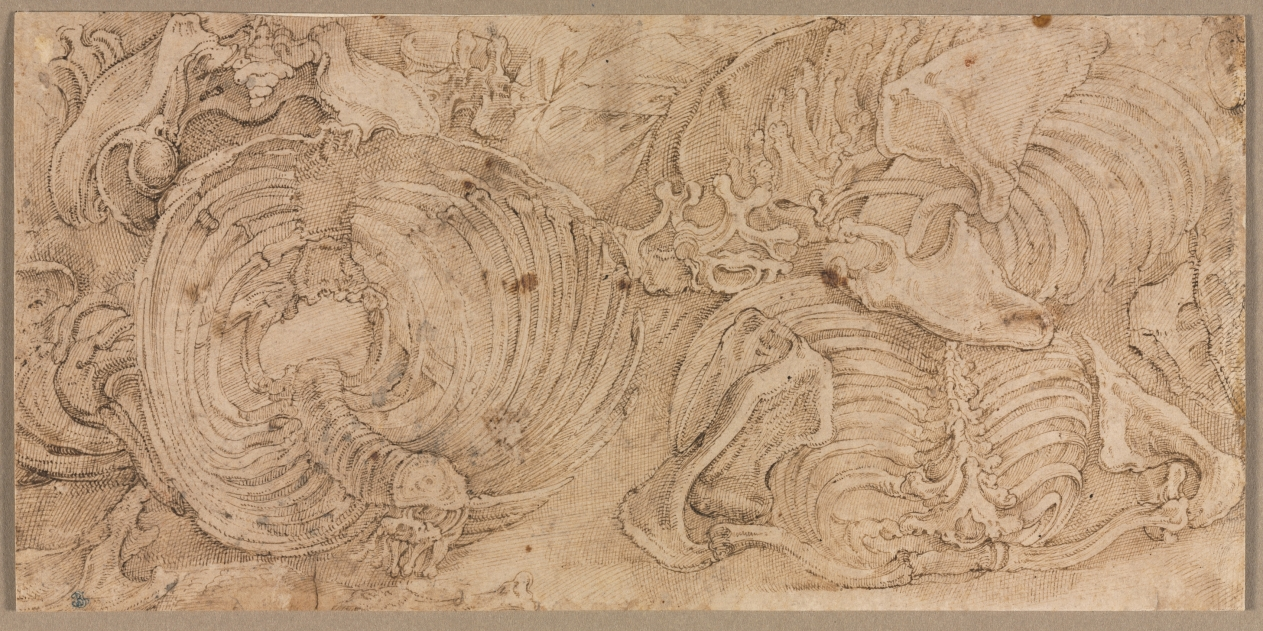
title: Rib Cages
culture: Italy, 16th century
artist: Battista Franco (Italian, c. 1510–1561)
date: early 1540s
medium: pen and brown ink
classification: Drawing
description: Michelangelo was among the first artists in Europe to attend a human dissection and to adopt anatomical knowledge as a necessity for depicting the human figure. These drawings by Battista Franco reflect the increased—and slightly macabre—interest in the interior workings of the human body inspired in part by Michelangelo’s example. Here, the groupings of rib cages, though rendered accurately, are placed into decorative piles. The odd assembly vacillates between scientific study and a symbolic memento mori, or reminder of death.